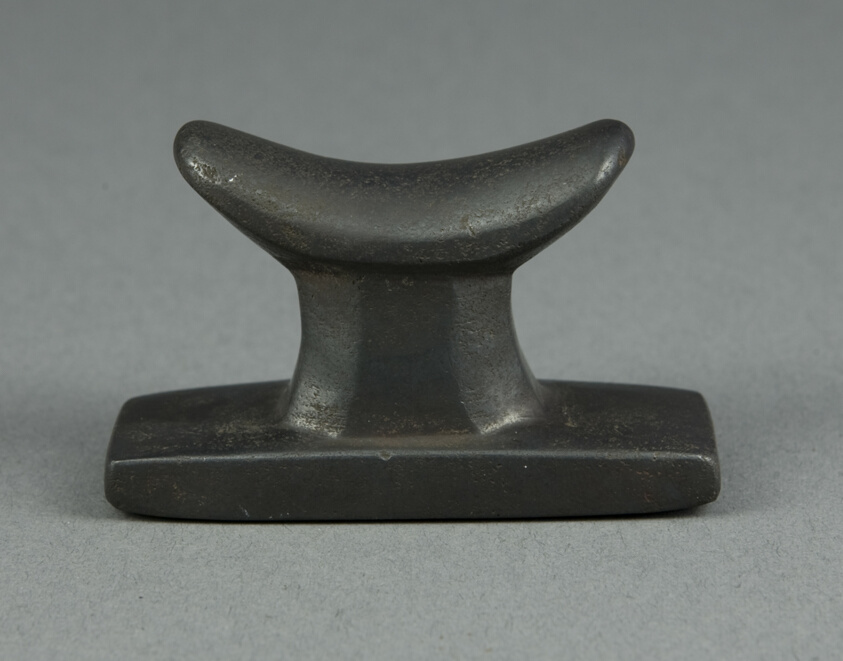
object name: Costume and Accessories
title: Amulet of a Headrest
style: egyptian, ancient, greco-roman (egyptian), late period (egyptian), ptolemaic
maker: Egyptian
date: Late Period–Ptolemaic Period (7th –1st century BCE)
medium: Hematite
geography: Egypt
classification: amulet; jewelry; stone; ancient art; costume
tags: Headrest